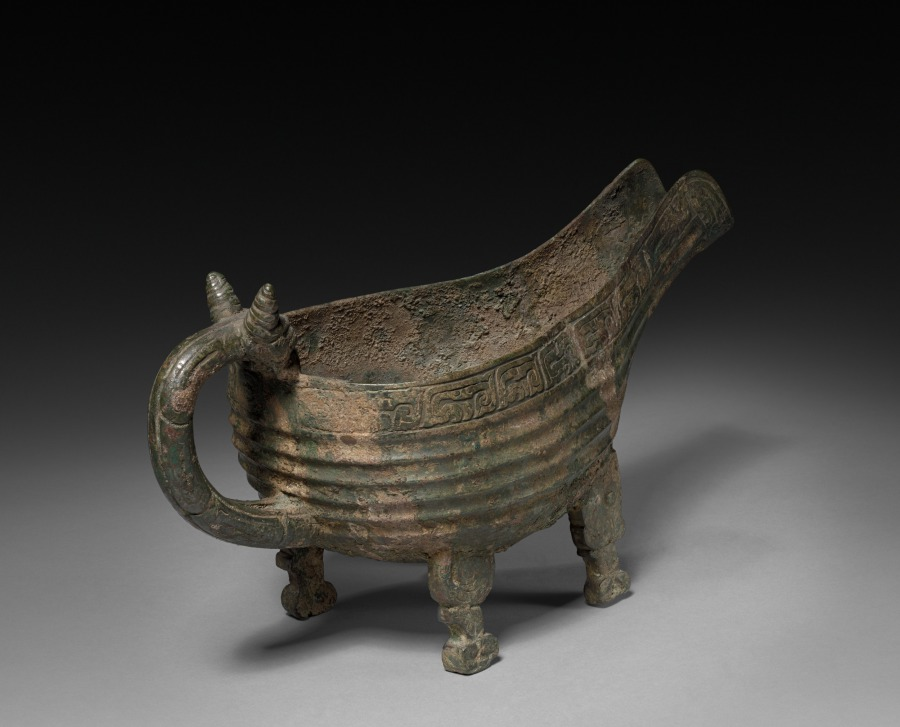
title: Yi: Libation Vessel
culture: China, Zhou dynasty (c. 1046–256 BCE)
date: c. 900–600 BCE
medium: bronze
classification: Metalwork